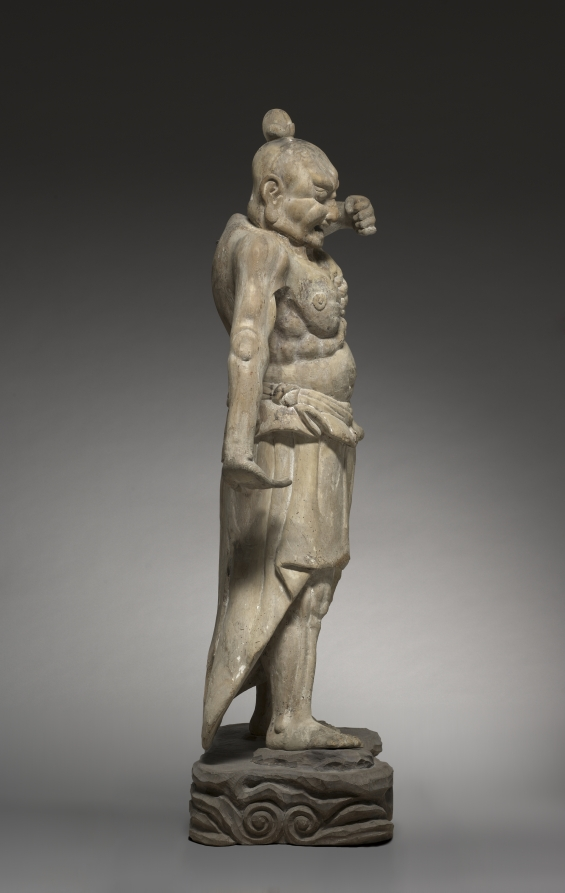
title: Guardian Figure: Nio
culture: Japan, Kamakura period (1185–1333)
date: 1200s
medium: chestnut and cypress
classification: Sculpture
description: Paired with a closed-mouth Nio, this figure originally protected the entrance of a Buddhist temple in Japan. Sculpted in an expressive, dynamic style, this figure was created using several pieces of wood carefully joined together. This imposing figure was originally painted, though is substantially faded due to weathering. The carved wooden bases for the two guardian figures on display are modern replacements.